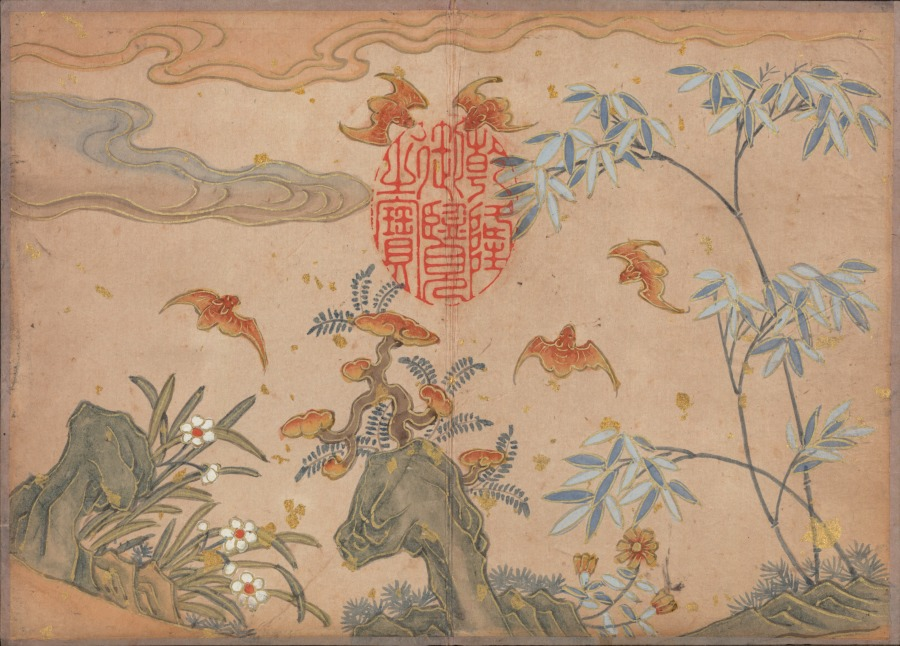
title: Desk Album: Flower and Bird Paintings (Bats, rocks, flowers oval calligraphy)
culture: China, Qing dynasty (1644-1911)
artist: Zhang Ruoai (Chinese, 1713–1746)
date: 1700s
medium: album leaf, ink and color on paper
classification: Painting